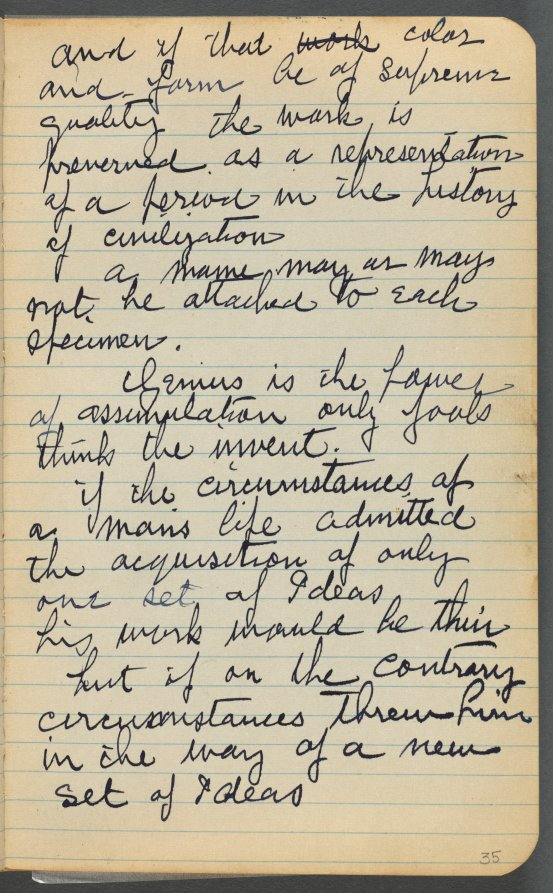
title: Sketchbook, page 035: Notes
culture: America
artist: Maurice Prendergast (American, born Newfoundland [now Canada], 1858–1924)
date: 1905–10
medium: graphite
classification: Bound Volume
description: This sketchbook contains 69 pages of drawings, a diary largely devoted to the state of the artist's health, and a three-page discourse on the nature of genius and ideas.